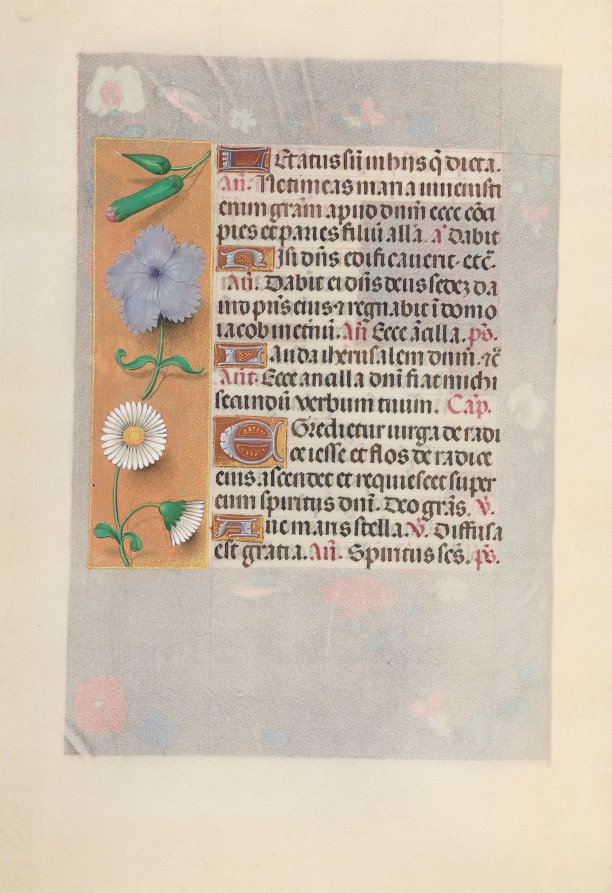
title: Hours of Queen Isabella the Catholic, Queen of Spain: Fol. 160v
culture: Flanders, Ghent and Bruges, late 15th century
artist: Master of the First Prayerbook of Maximillian (Flemish, c. 1444–1519)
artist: and Associates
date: c. 1500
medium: ink, tempera, and gold on vellum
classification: Bound Volume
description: This manuscript was illuminated by a circle of at least five highly organized manuscript painters active in the Flemish cities of Ghent and Bruges. The principal illuminator was Alexander Bening, who painted the majority of the book's miniatures. Manuscripts produced by this circle of artists are renowned for the decoration of their borders, which typically feature a rich variety of realistically-painted flowers, birds, and butterflies. This prayer book, called a book of hours, was intended not for a cleric, but for the private devotions of a lay person-in this case, Isabella the Catholic, Queen of Spain (1451-1504). Isabella's coat of arms embellishes the book's frontispiece. It is unlikely that the book was commissioned by the Queen herself; rather, she probably received it as a diplomatic gift from someone courting her patronage, perhaps Cardinal Francisco Jimenez de Cisneros. A Franciscan friar, Jimenez was dependent upon Isabella for his advancement, first to the post of Queen's confessor in 1492, and then to Archbishop of Toledo in 1495.